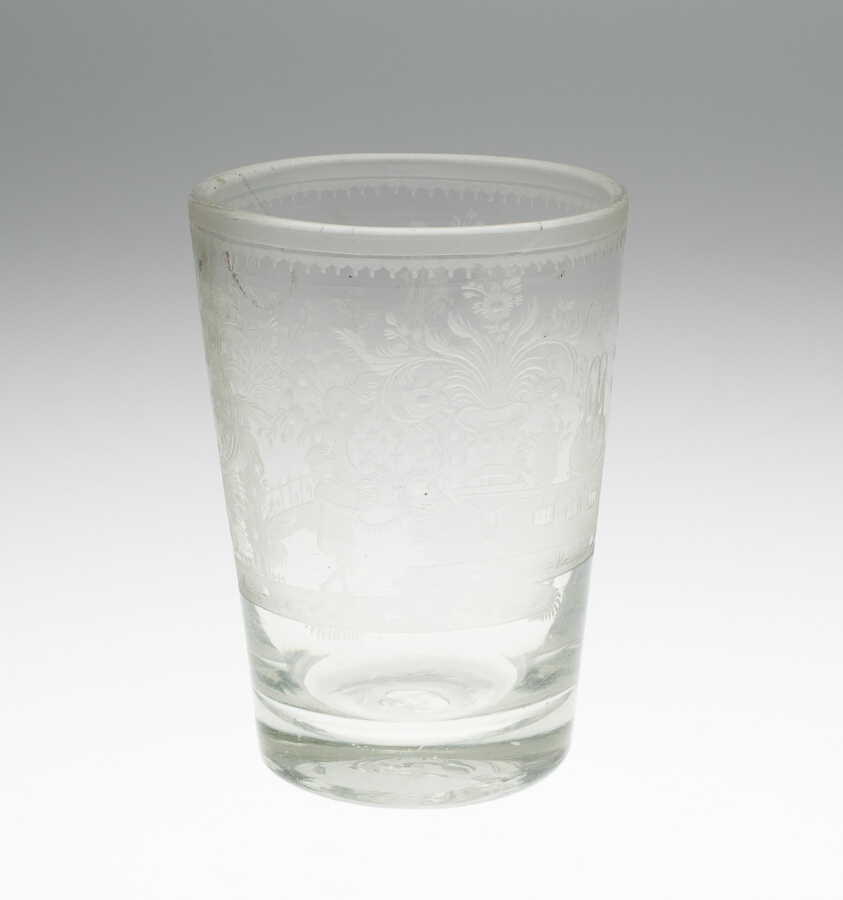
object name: Glass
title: Beaker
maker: Russia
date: c. 1760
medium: Glass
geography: Russia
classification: drinking vessel; glass; european decorative arts